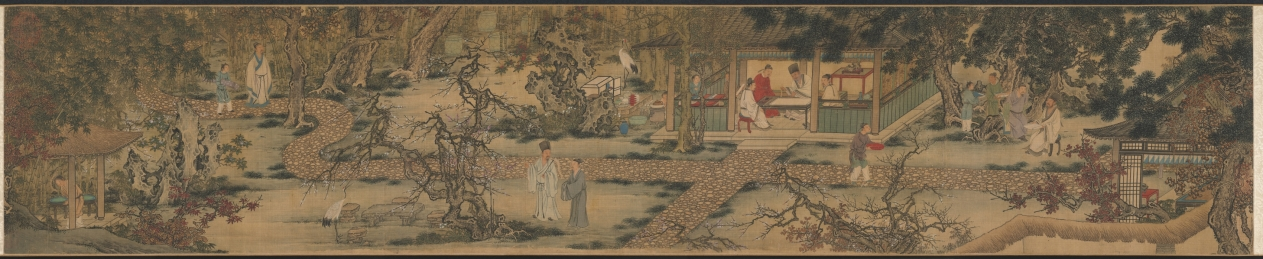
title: The Nine Elders of the Mountain of Fragrance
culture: China, Ming dynasty (1368–1644)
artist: attributed to Xie Huan (Chinese, c. 1370-c.1450)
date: 1426–52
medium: handscroll, ink and color on silk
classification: Painting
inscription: 4 seals: 2 of Xiang Yuanbian 項元汴 (1525–1590); 1 of the Qianlong Emperor (r. 1736-95); 1 of C. C. Wang 王季遷 (1907–2003)